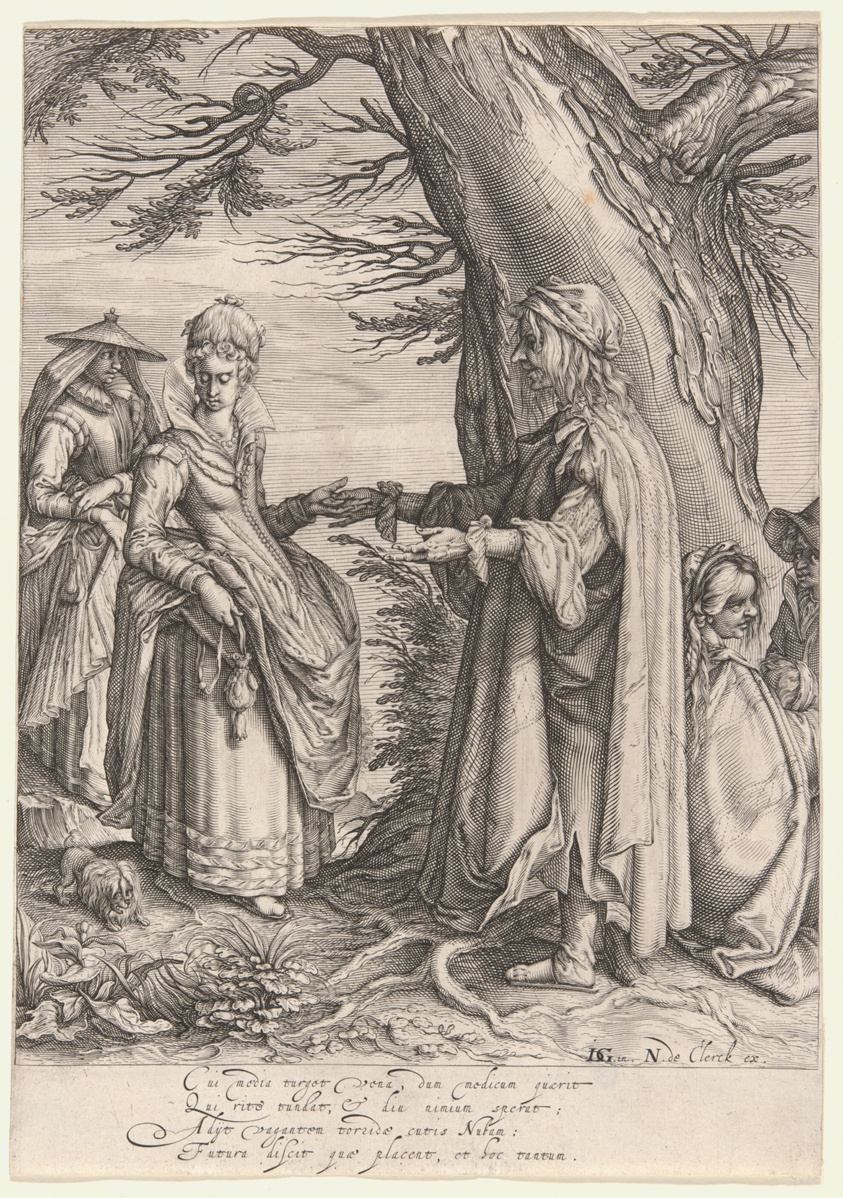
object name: Print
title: Fortune-Teller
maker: Andries Stock (Dutch, c. 1580-after 1648); after Jacques de Gheyn II (Dutch, 1565-1629)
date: c. 1608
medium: Engraving on cream laid paper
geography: Netherlands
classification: engraving; print; prints and drawing